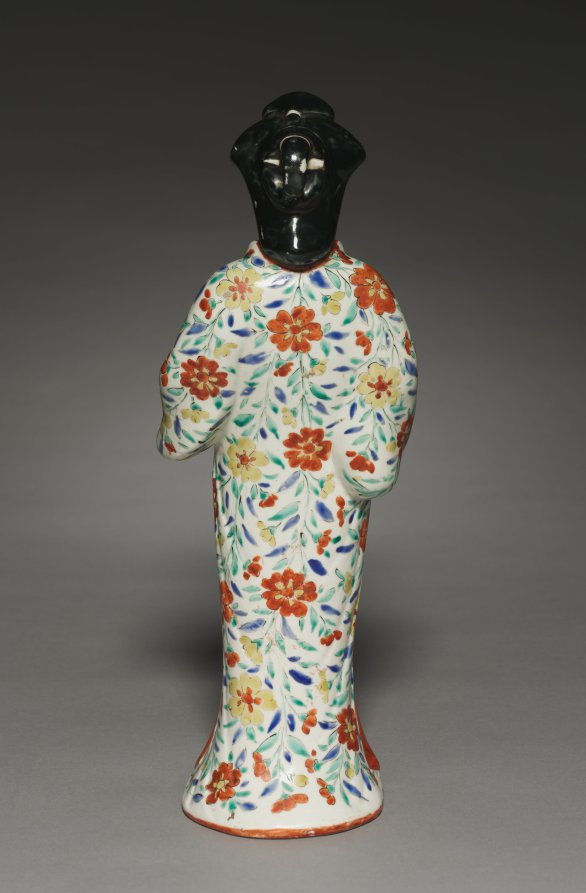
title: Standing Figure of a Beauty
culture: Japan, Edo period (1615–1868)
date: c. 1690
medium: Porcelain with overglaze color enamels (Hizen ware, Kakiemon type)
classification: Ceramic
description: Dressed in layered robes and a jacketlike garment called an uchikake with a lively floral design, figures such as this one may have derived from dolls formed in the likeness of courtesans. It was produced in Hizen Province (in present-day Saga Prefecture on the island of Kyushu) by the Sakaida family of ceramists, the head of which has gone by the first name Kakiemon for many generations. As a result, the studio’s historical works are known as Kakiemon ware. The studio is distinguished for being among the earliest in Japan to use multicolor overglaze enamel and for the milky white of its porcelain.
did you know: Look closely! One of this fashionable woman's feet is peeking out from under her layered kimono.